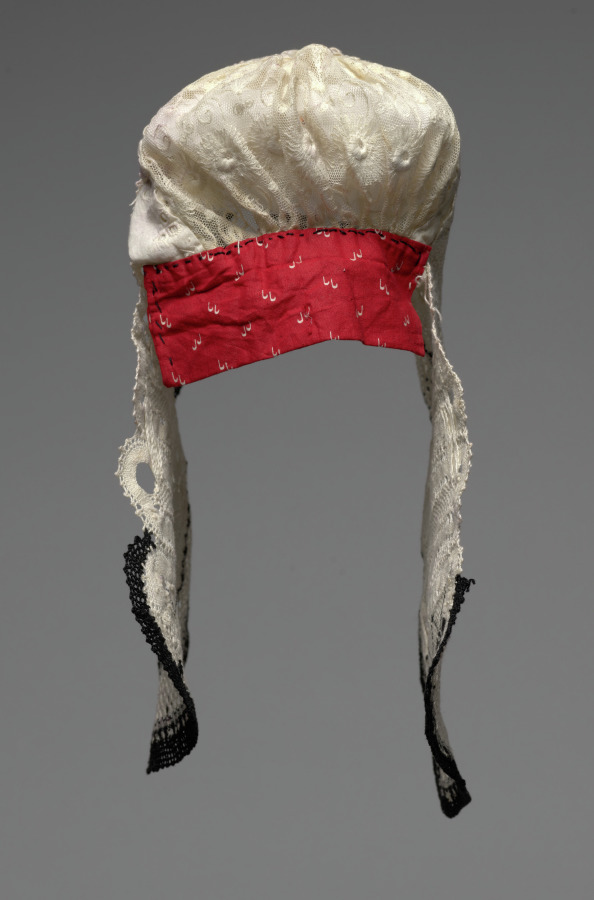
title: Lace Cap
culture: Hungary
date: 1800s(?)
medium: Cotton: bobbin lace and machine-made lace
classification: Lace